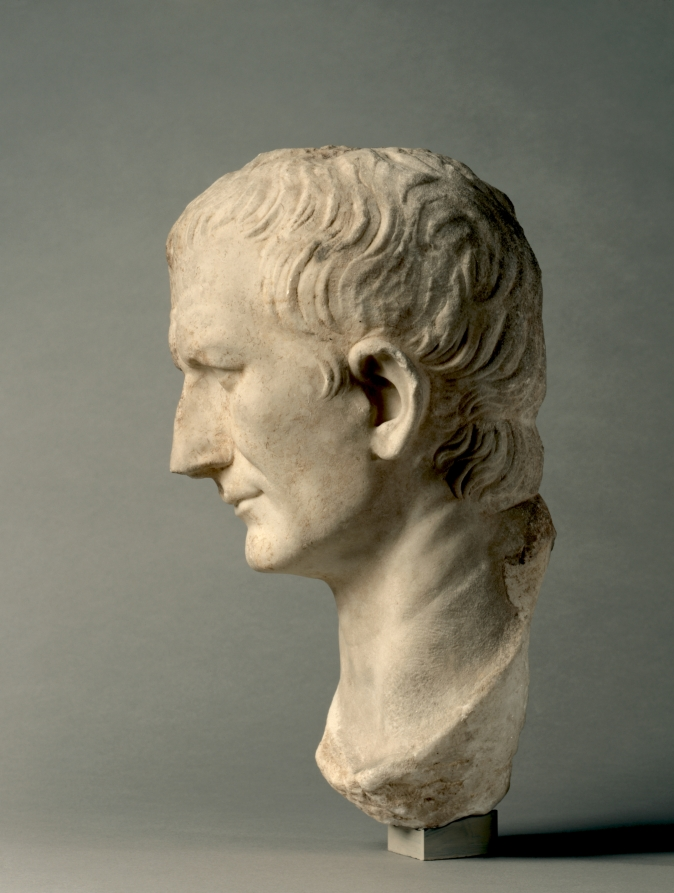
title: Portrait Head of Emperor Vespasian, Recut from Head of Nero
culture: Italy, Roman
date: 64–79 CE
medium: marble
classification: Sculpture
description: Although this portrait head was designed to fit into a statue of a body, it did not originally belong with the togate body that held it when purchased by the museum in 1929. In 1973, the two were separated, and the body is now in storage. The head itself was recarved in antiquity, from a likeness of Nero to one of Vespasian, following the damnatio memoriae (condemnation of memory) of the former. A line at the back of head shows clearly where the long hair of Nero has been shortened, while other Neronian features, such as a receding lower lip, remain.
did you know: Originally a portrait of Emperor Nero, this head was recarved after his damnatio memoriae (condemnation of memory).